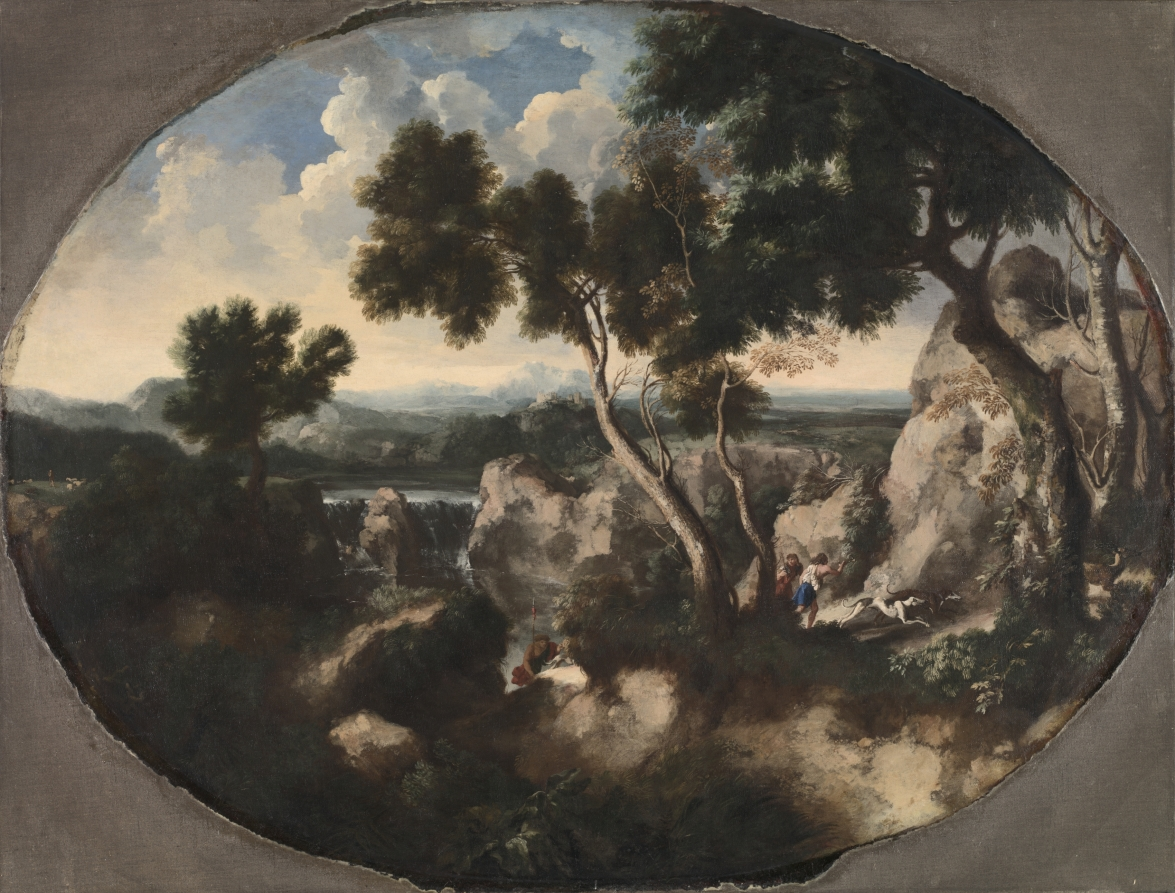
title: Rocky Landscape with Hunters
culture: France, 17th century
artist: Gaspard Dughet (French, 1615–1675)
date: c. 1635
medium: oil on canvas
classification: Painting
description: Dughet spent his whole career in Rome. At the age of fifteen he entered the studio of Nicolas Poussin (1593/94-1665), who married his sister. Dughet concentrated exclusively on landscapes, preferring a rugged type of scenery, widely imitated well into the 18th century.